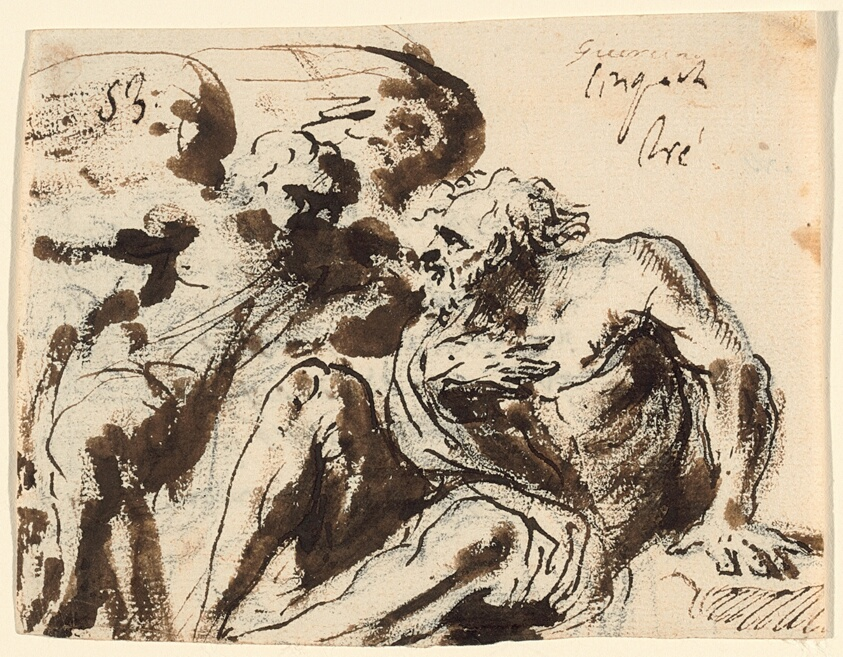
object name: Drawing and Watercolor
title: Angel Comforting a Hermit Saint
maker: Attributed to Giovanni Battista Pace; Italian, active c. 1650-c. 1664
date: 1660s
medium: Pen and iron-gall ink, with brush and iron-gall ink wash, over black chalk, on cream laid paper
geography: Italy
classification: drawings (visual works); paper; pen and ink drawings; prints and drawing